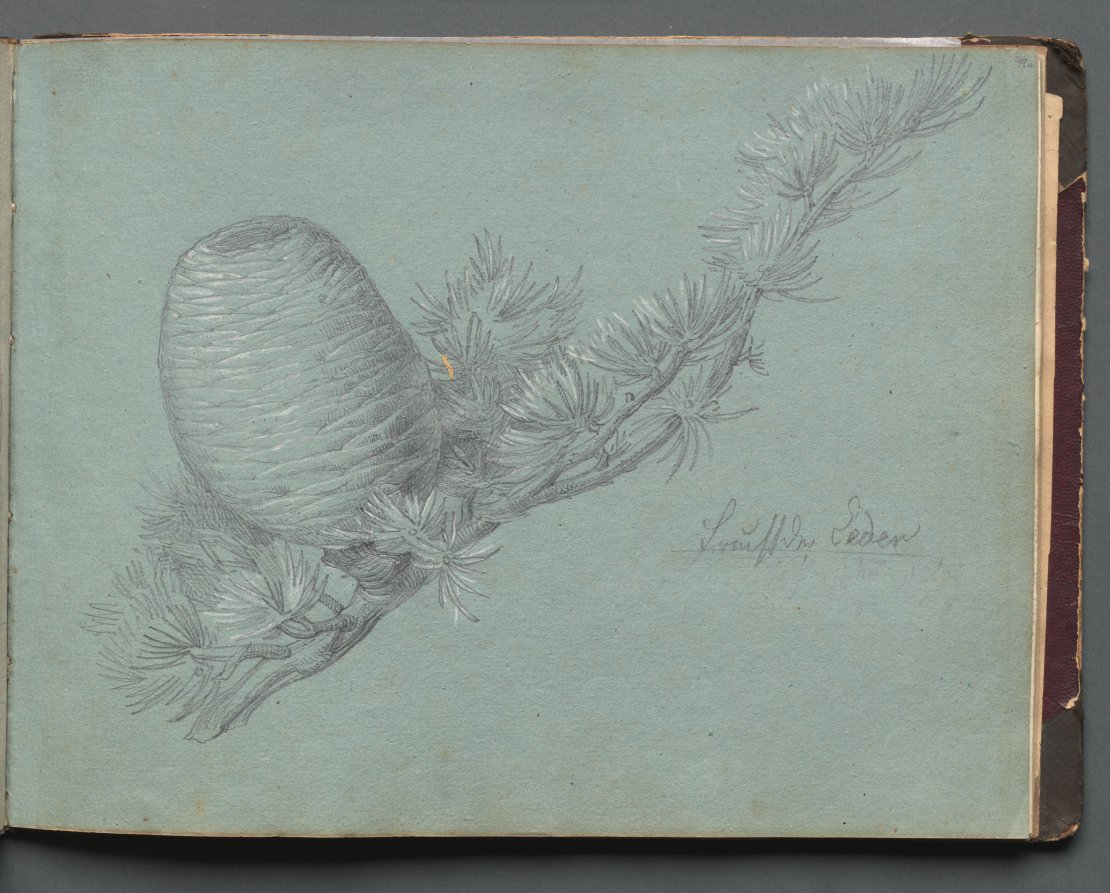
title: Album with Views of Rome and Surroundings, Landscape Studies, page 49a: Study of a Evergreen Branch with Pinecone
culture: Germany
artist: Franz Johann Heinrich Nadorp (German, 1794–1876)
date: c. 1830s-70s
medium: graphite with white heightening on blue paper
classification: Bound Volume